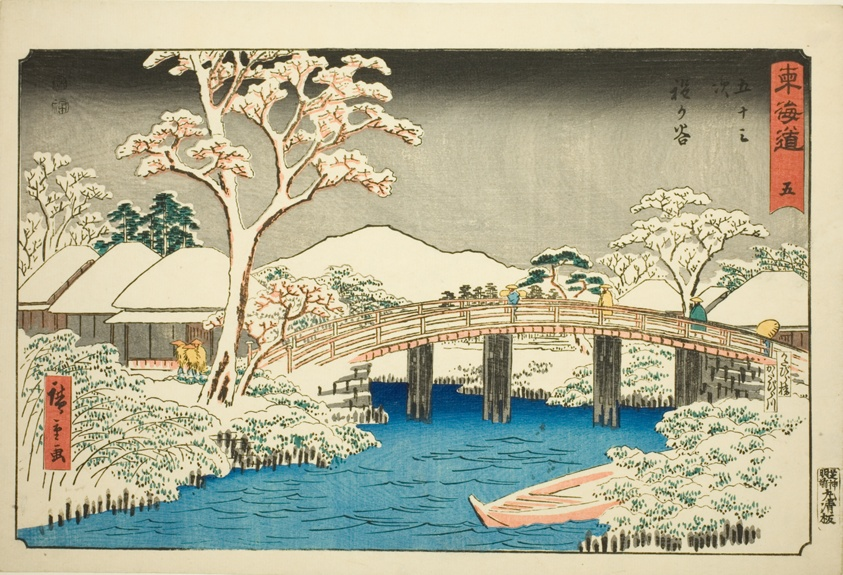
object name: Print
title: Hodogaya: Katabira River and Katabira Brige (Hodogaya, Katabiragawa Katabirabashi)—No. 5, from the series "Fifty-three Stations of the Tokaido (Tokaido gojusan tsugi)," also known as the Reisho Tokaido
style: Japanese (culture or style)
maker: Utagawa Hiroshige 歌川 広重; Japanese, 1797-1858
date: c. 1847/52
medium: Color woodblock print; oban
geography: Japan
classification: woodblock print; print; asian art